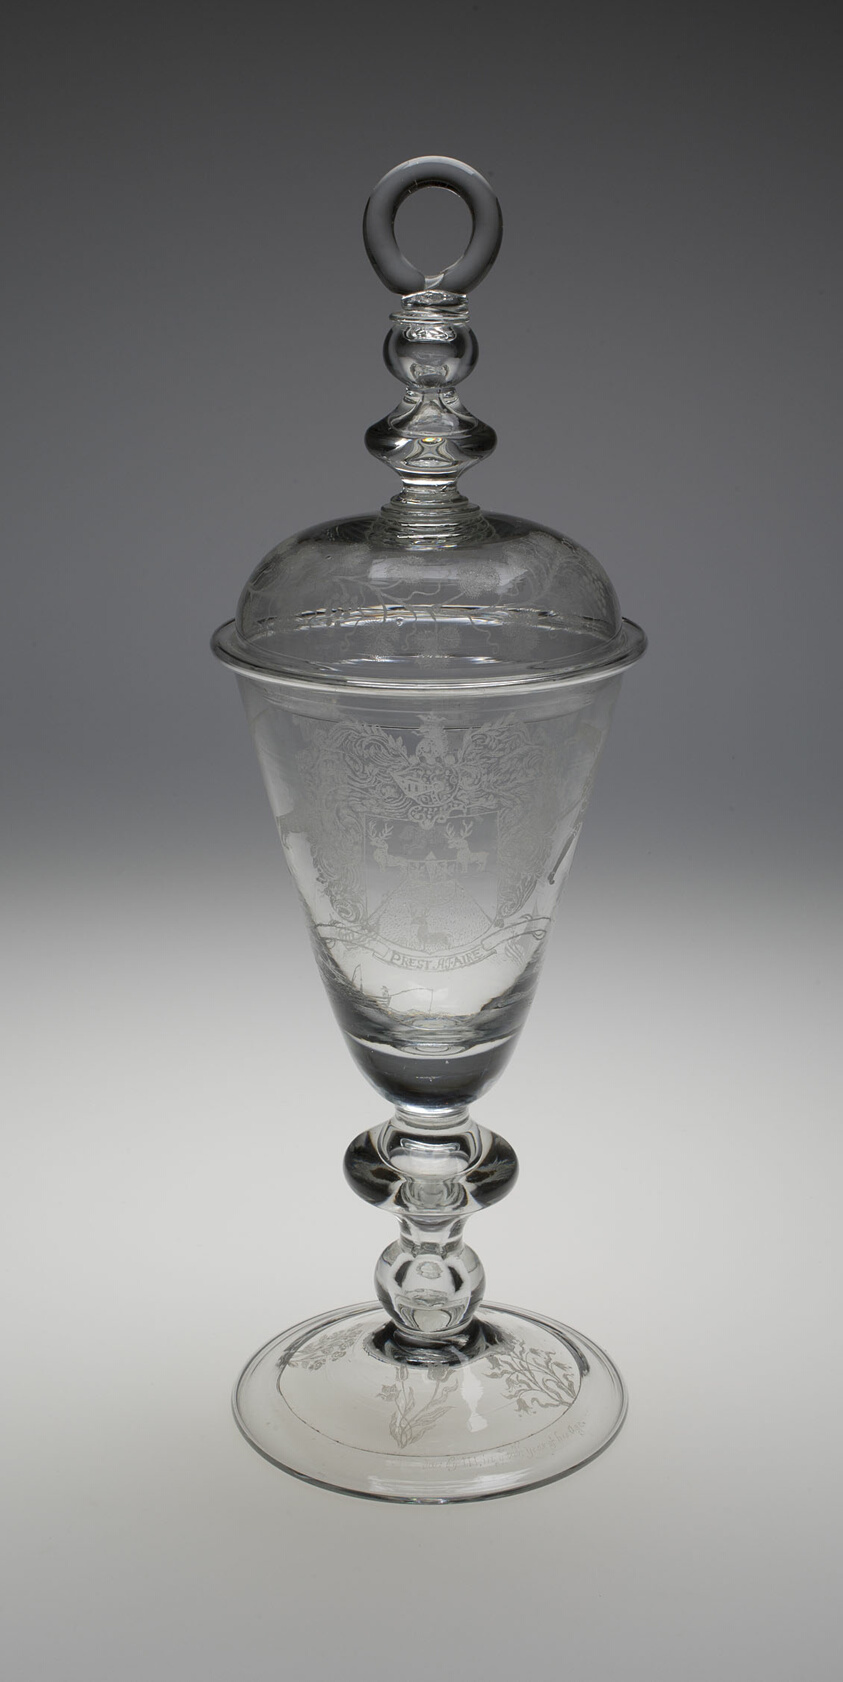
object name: Glass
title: Covered Diamond-Engraved Armorial Marriage Goblet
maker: England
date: c. 1700–1709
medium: Diamond-engraved lead glass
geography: England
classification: drinking vessel; glass